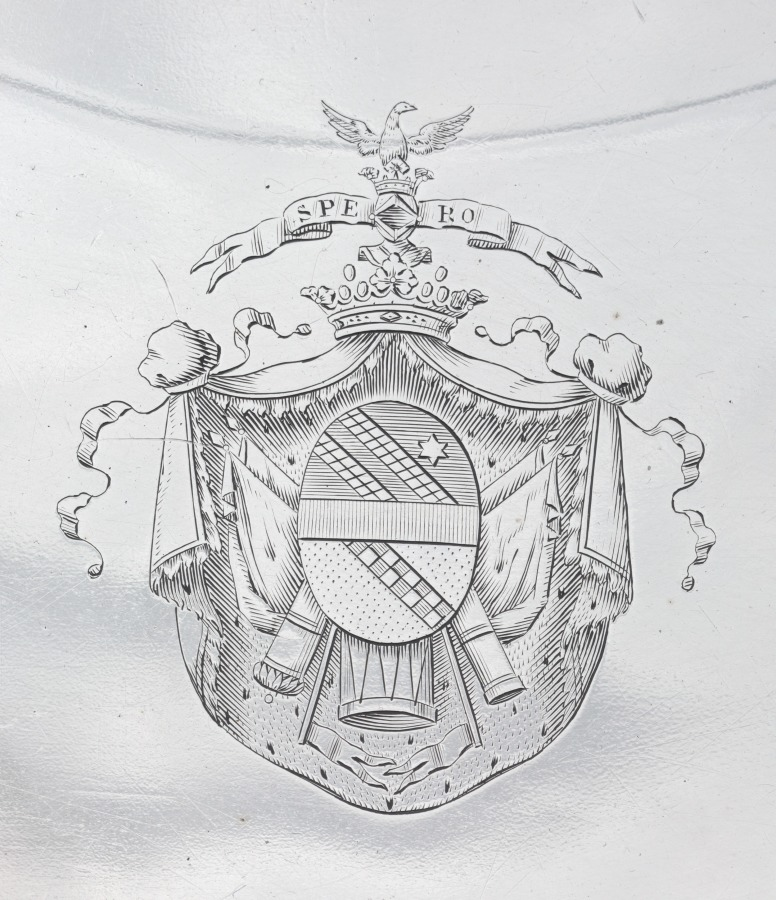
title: Covered Tureen on Stand (Pot à oille)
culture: France, late 18th-early 19th Century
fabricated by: Henry Auguste (French, 1759–1816)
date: 1797–98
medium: silver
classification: Silver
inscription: [Coat-of-arms of Amoral don Federico Carlos Gravina on bowl; cover; stand]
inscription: [Assay mark for large-sized work, 1798-1809, lining exterior; tureen foot exterior]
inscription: [Assay mark for medium-sized work, 1798-1809, beneath stand foot; on edge of cover]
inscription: [Maker's mark of Henri Auguste, master silversmith in 1785, beneath tureen foot; beneath stand foot; inside stand foot edge]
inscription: [Official assay mark for first standard silver, Paris, 1798-1809, beneath stand foot; lining exterior; on cover]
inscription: [Official mark for silver imported from countries with customs conventions, 1838-1912, beneath stand foot; edge of cover; tureen lip exterior; lining exterior; on one tureen handle; outside stand foot; tureen foot exterior]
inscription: [Unknown mark, possibly Ceres' profile in square with "E" and "7", beneath stand foot; on cover; rim of lining; tureen foot exterior; tureen lip exterior]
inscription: [Unofficial assay mark for first standard silver, Paris, 1794-1797, beneath foot stand; beneath tureen foot; near tureen handle exterior]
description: This pot-à-oille was designed by master goldsmith Henri Auguste after drawings by draftsman and sculptor Jean Guillaume Moitte. Though many of the neoclassical decorative elements on this piece are pulled from Moitte’s design, Auguste’s final product leaves out much of the proposed ornamentation. Instead this object finds distinction in its large size and smooth expanses of silver that emphasize the purity of its lines.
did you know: The coat of arms on the body of the work corresponds to the family of Federico Carlos Gravina, a Sicilian-Spanish admiral who was known to have had a close diplomatic relationship with Napoleon I.